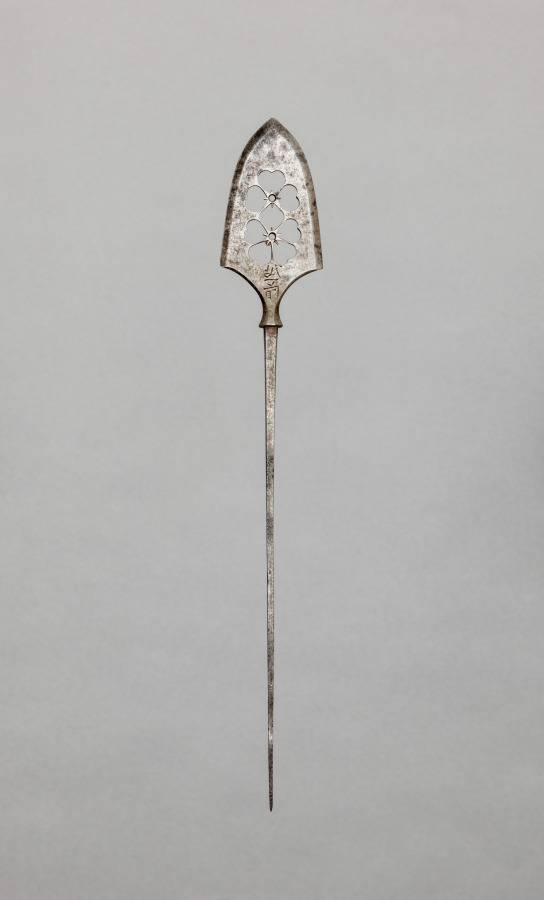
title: Arrow Point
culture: Japan, Edo period (1615–1868)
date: 1700s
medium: steel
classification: Arms and Armor